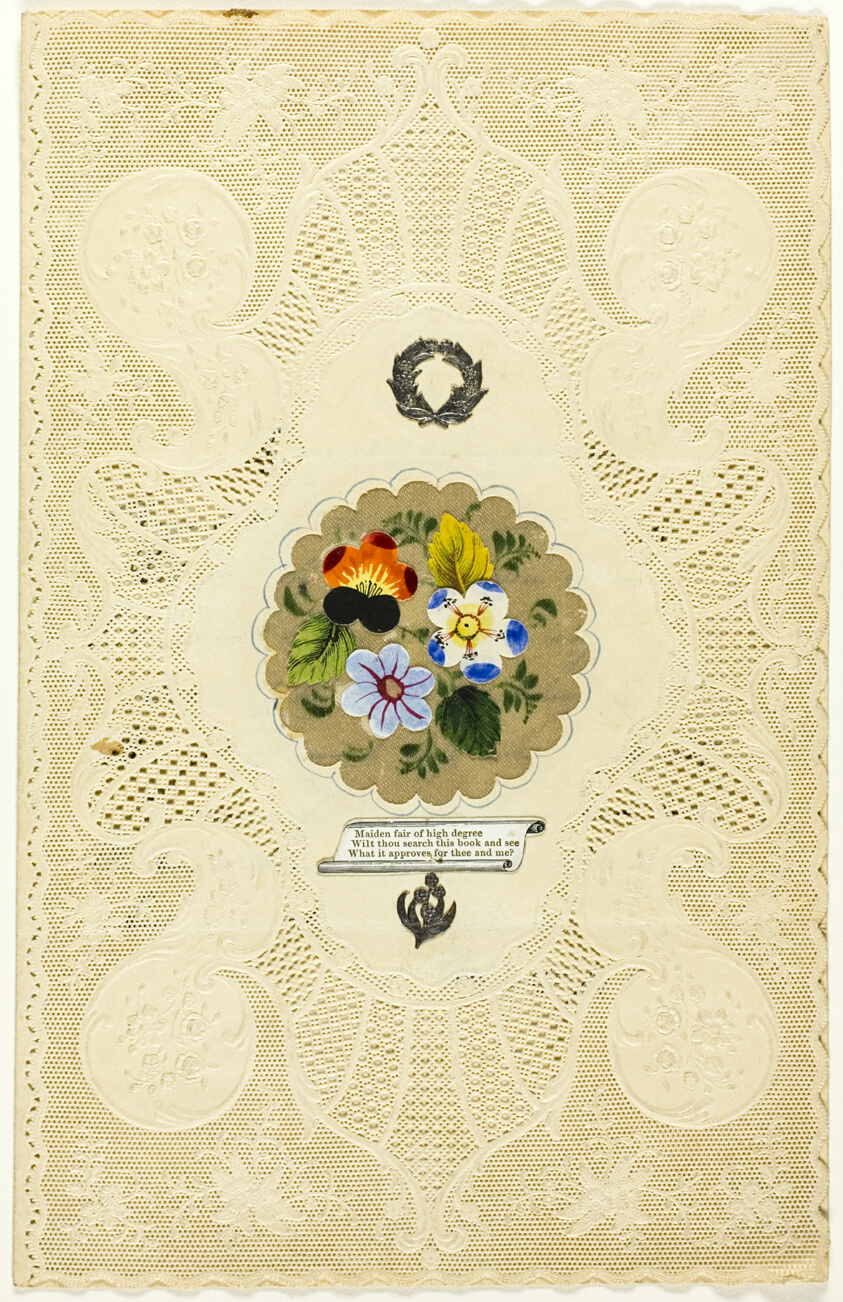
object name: Drawing and Watercolor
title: Maiden Fair of High Degree (valentine)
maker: Joseph Mansell (English, 19th century)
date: 1845/50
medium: Collaged elements with watercolor on cut and embossed ivory wove paper (lace)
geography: England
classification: collage; valentine; prints and drawing; paper